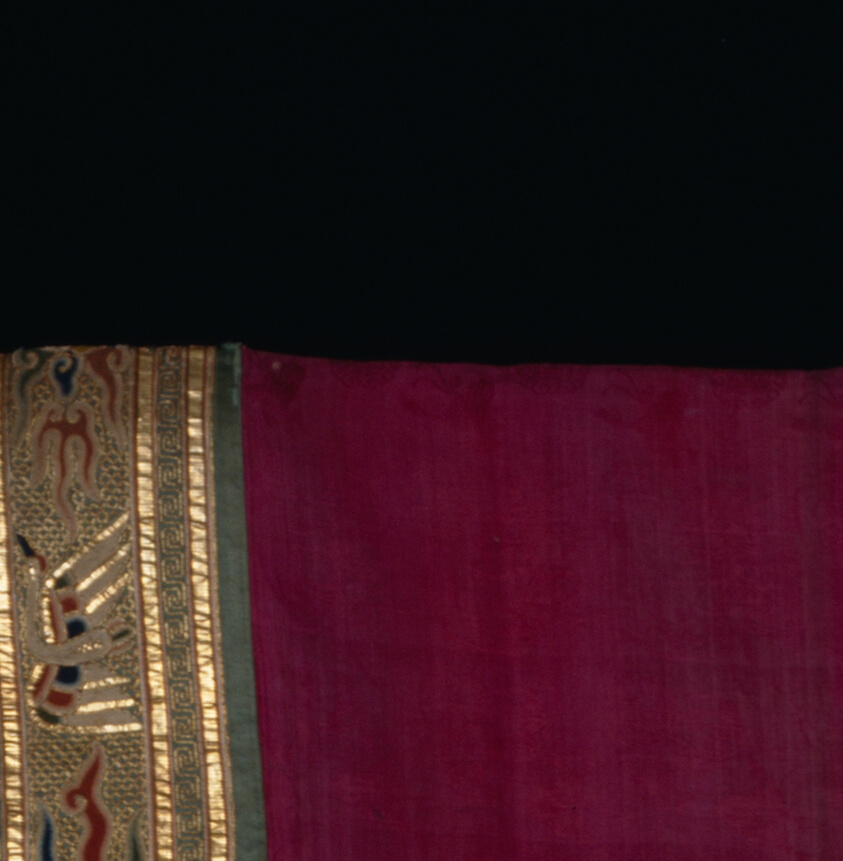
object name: Costume and Accessories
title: Vestment (For a Second-degree Taoist Priest)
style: qing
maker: Han-Chinese (China)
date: Qing dynasty (1644–1911), 1801/50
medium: Silk, warp-float faced 3:1 'S' twill weave self-patterned by areas of plain weave; edge bands and center back: silk, warp-float faced 7:1 satin weave; embroidered with silk, gold-leaf-over-lacquered paper, and gold-leaf-over-lacquered-paper-strip-wrapped silk in satin and knot stitches; laid work and couching; inner collar and closures: silk, weft-float faced 1:7 satin weave; collar patches: silk, warp-float faced 7:1 satin weave; lined with ramie, plain weave; lining fragments: silk, warp-float faced 4:1 satin weave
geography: China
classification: textile; needlework (visual works); weaving; costume